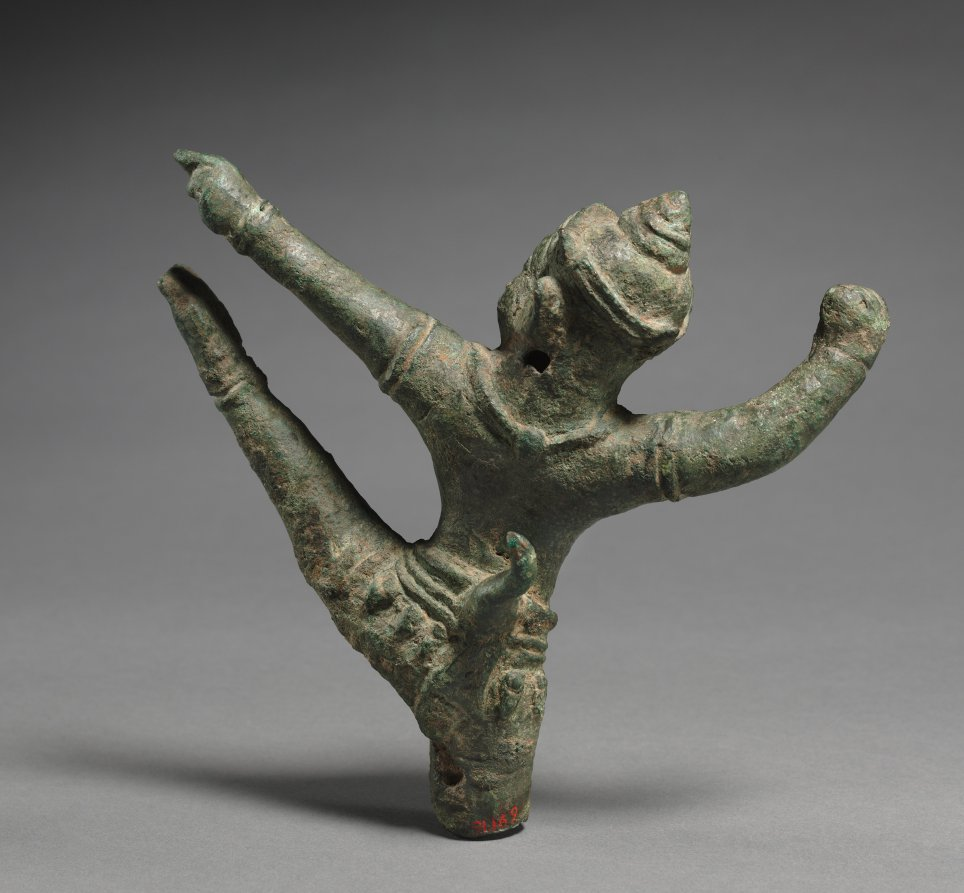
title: Hanuman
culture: Cambodia, Angkor, Bayon style, 12th Century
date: 1100s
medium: bronze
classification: Sculpture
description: When posed in this powerful and exuberant manner, the image of Hanuman stood at the top of a standard. As the son of the wind god and the most powerful of the primeval forest-dwellers, who are depicted with the head and tail of a monkey and the body of a man, Hanuman as an emblem spelled success in battle.